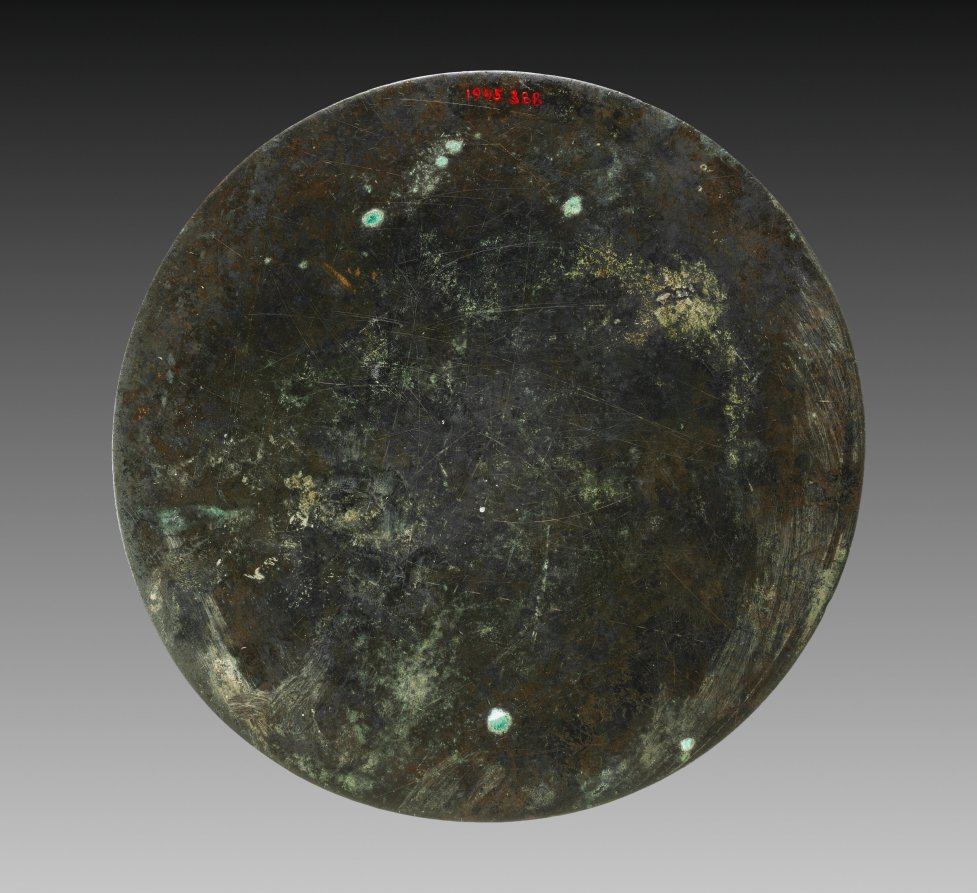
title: Mirror with Twin Dragons and Lotus Blossoms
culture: China, Shanxi province, Hezhong, Yuan dynasty (1271-1368)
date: 1338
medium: bronze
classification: Metalwork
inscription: 河中府馬溝玉家自家門人監造白銅鏡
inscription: 至元四年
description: The mirror features a pair of dragons poised to seize flaming pearls. Blossoms like lotus and chrysanthemum emerge among the dragons. Surrounding the central knob of the mirror is a square enclosing the characters "至元四年 (Fourth Year of Zhiyuan, 1338)." The square also encompasses a barely legible engraving which identifies the workshop in today’s Shanxi province: "White bronze mirror cast under the supervision of retainers from the house of Ma Gouyu in the prefecture of Hezhong."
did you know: This intricate mirror was donated in honor of Sherman Lee, the museum's longest tenured director.